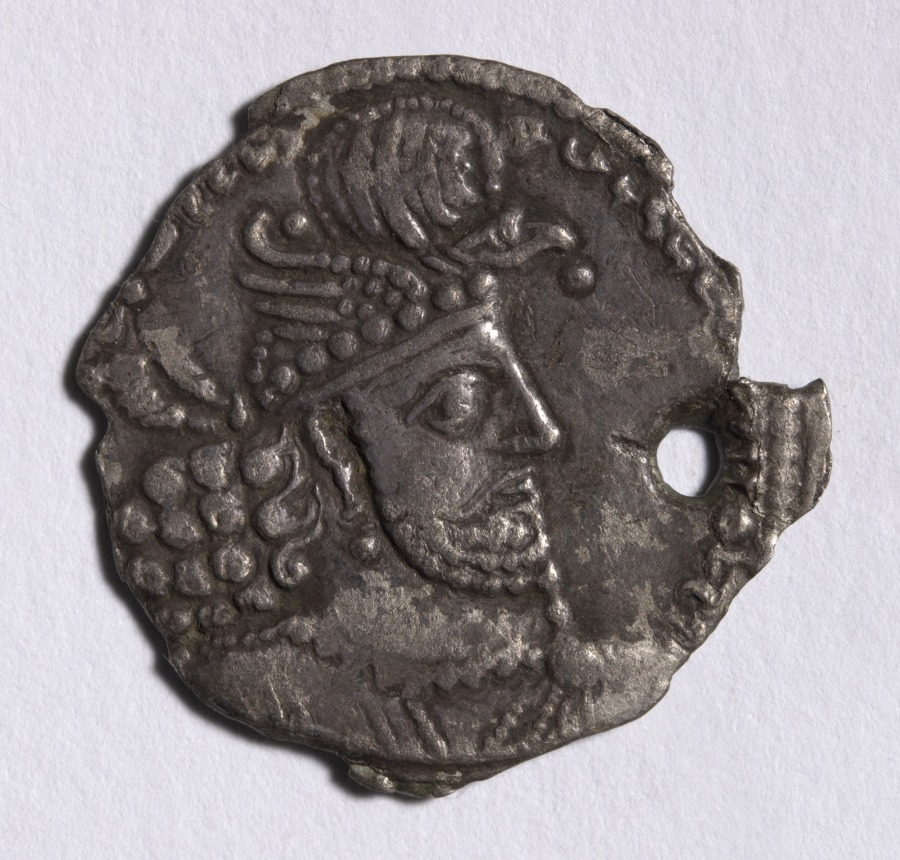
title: Drachm: Bust of Hormizd II (obverse); Fire Altar with Bust (reverse)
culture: Iran, (minted), Sasanian Empire (224–651 CE), reign of Hormizd II (303–309)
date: 302–9 CE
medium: silver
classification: Coins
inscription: 𐭬𐭦𐭪𐭠𐭠𐭭𐭬𐭫𐭪𐭠𐭠𐭩𐭫𐭠𐭭𐭬𐭭𐭪𐭲𐭥𐭬𐭭𐭩𐭦𐭣𐭠𐭭 𐭬𐭦𐭣𐭩𐭮𐭭𐭡𐭢𐭡𐭥𐭧𐭬𐭦𐭣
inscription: 𐭠𐭲𐭥𐭫𐭦𐭩𐭠𐭥𐭧𐭬𐭦𐭣